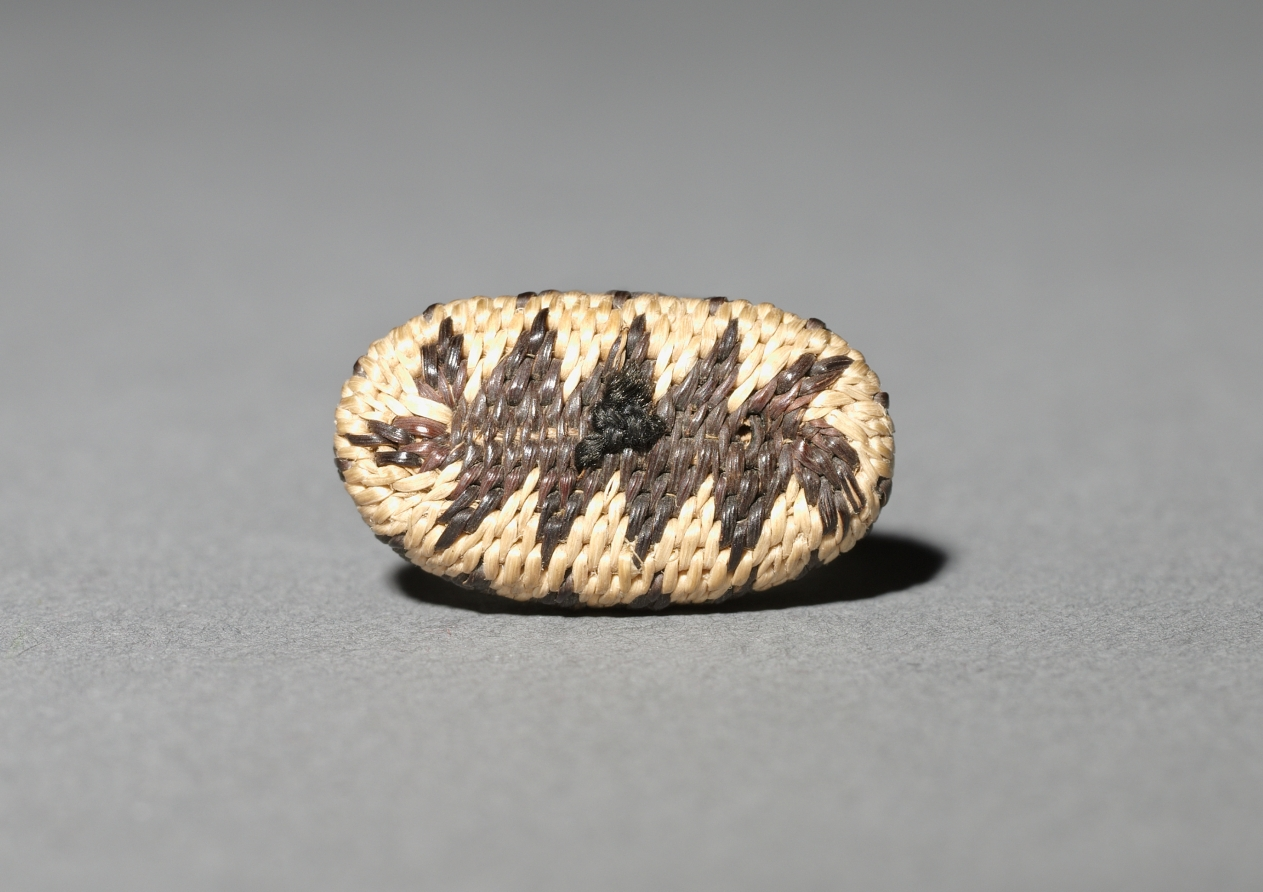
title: Miniature Rhomboidal Basket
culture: California, Pomo, late 19th-early 20th century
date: late 1800s-early 1900s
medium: plant materials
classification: Basketry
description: Miniature baskets were made to demonstrate the basket-maker’s virtuoso skill, and these tiny marvels seem to be no exception—the smallest are just a few millimeters wide but still patterned. For such fine work, dexterity was required as much for preparation of materials as for weaving.